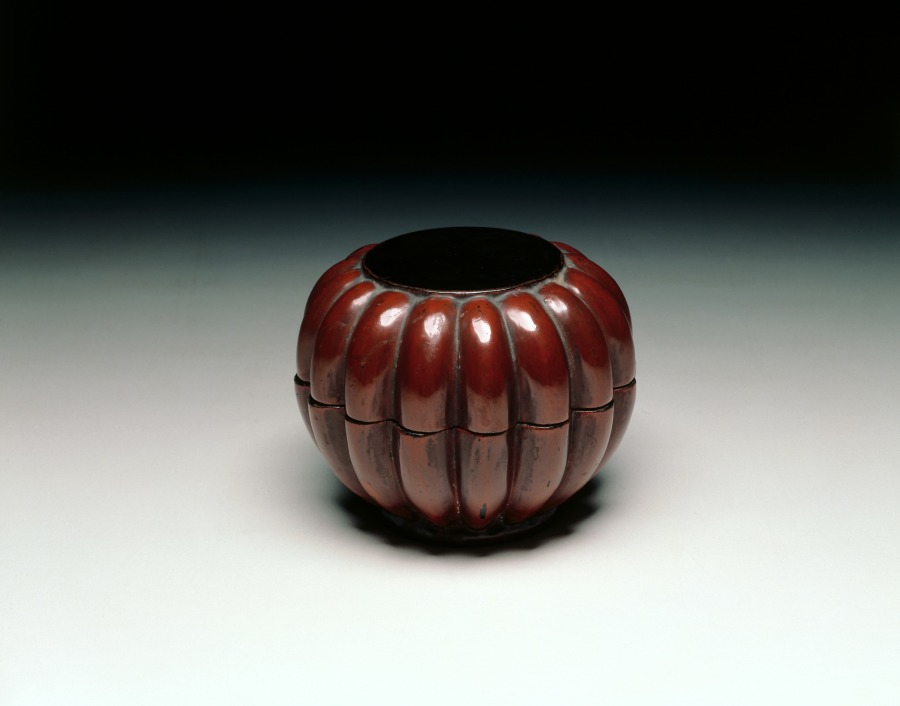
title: Tea Caddy (Chaire)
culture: Japan, Muromachi period (1392–1573)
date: 1500s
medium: Negoro lacquer on wood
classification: Lacquer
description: Negoro is a lacquer technique, named after the Negoro temple in Japan, in which several layers of red lacquer are applied over a black lacquer undercoating. Through years of handling, a natural surface of red and black random patterns emerges, an aesthetic highly prized by the Japanese.